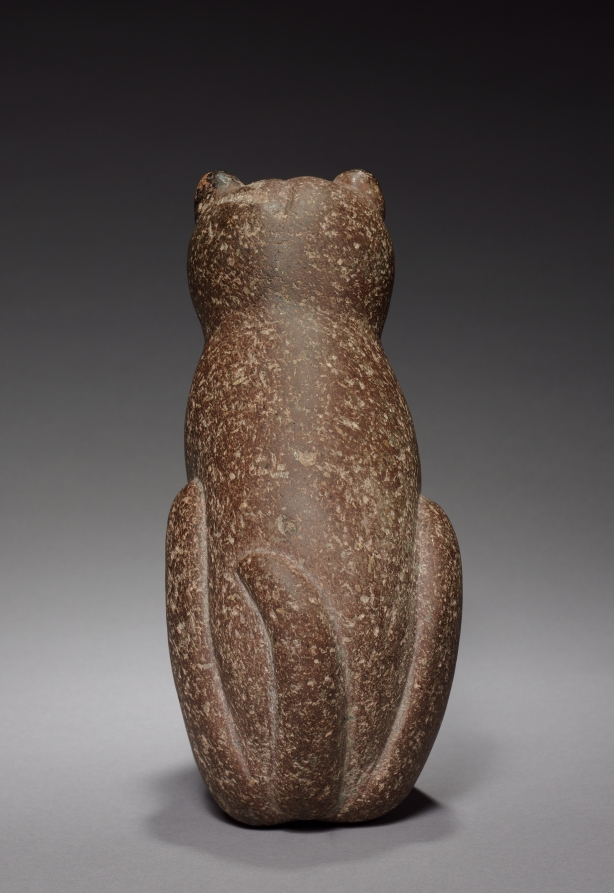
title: Feline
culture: Central Mexico, Aztec, 13th-16th century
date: c. 1200–1519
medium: stone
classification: Sculpture